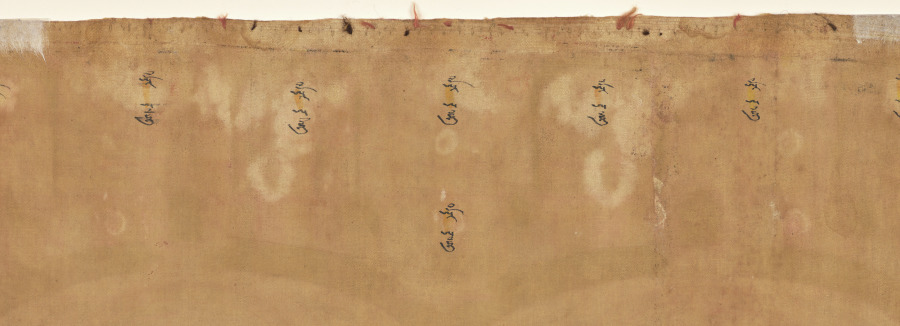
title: Portraits of Two Lineage Masters of the Kagyu Order: Phagmo Drupa (1110–1170) and Tashipel (1142–1210)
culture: Central Tibet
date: c. 1236–1310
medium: Gum tempera on sized cotton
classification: Painting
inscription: [1] ōṃ ŌṂ [2] sa rva vyid [3] svā hā// ōṃ [4] su pra ti ṣṭha vajra [5] svā hā// ye dha [6] rma he tu pra bha vā he tun te śan [7] ta tha ga to hya va tad de ṣan ca [8] yo ni ro dha ye vaṃ vā [9] ti ma [hā] śra [ma] ṇa// bzod [10] pa dka’ A thub bzod [11] daṃ pa ni[//] mya ngan ’das [12] ces sangs rgyas gsung// [13] rab tu byung ba gzhan la gnod pa ni dang// [14] gzhan la ’tshe HŪṂ ba de ni dge sbyong ma [15] yin no//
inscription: [1] ōṃ ŌṂ [2] sa rva vyid svā [3] hā// ōṃ su pra [4] ti ṣṭha vajra svā hā// [5] ye dha rma he tu pra bha vā he tun te śan ta tha ga to [6] hya va tad de ṣan ca yo ni ro dha e vaṃ vā ṭi ma hā [7] śra ma na ye// bzod pa dka’ thub [8] bzod pa daṃ pa ni// mya ngan pa [9] ’das ces A sangs rgyas gsung: [10] rab tu byung ba gzhan la gnod pa dang[//] gzhan la ’tshe ba [11] de ni dge sbyong ma yin HŪṂ no// ōṃ ma ni pad me hūṃ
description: High-level leaders of Buddhist monastic institutions were frequent portrait subjects of early thangka painting (devotional cloth scrolls) in Central Tibet. The lama (Tibetan monk) on the right founded Taklung Monastery in Lhasa, the capital of Tibet, which became an important institutional center of the Kagyu order. He is shown in discourse with his predecessor, whose teacher Gampopa (1079–1153), in turn, is the tiny gray-haired lama centered above them, between the colorful stylized mountain ranges. Their halos, lotus pedestal, and thrones with spitting elephant-trunked crocodiles and rearing griffins elevate them to the level of Buddhas and bodhisattvas. Despite their deification, they are still depicted with individualized facial features.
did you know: The Five Cosmic Buddhas in their six-armed forms are aligned at the top.